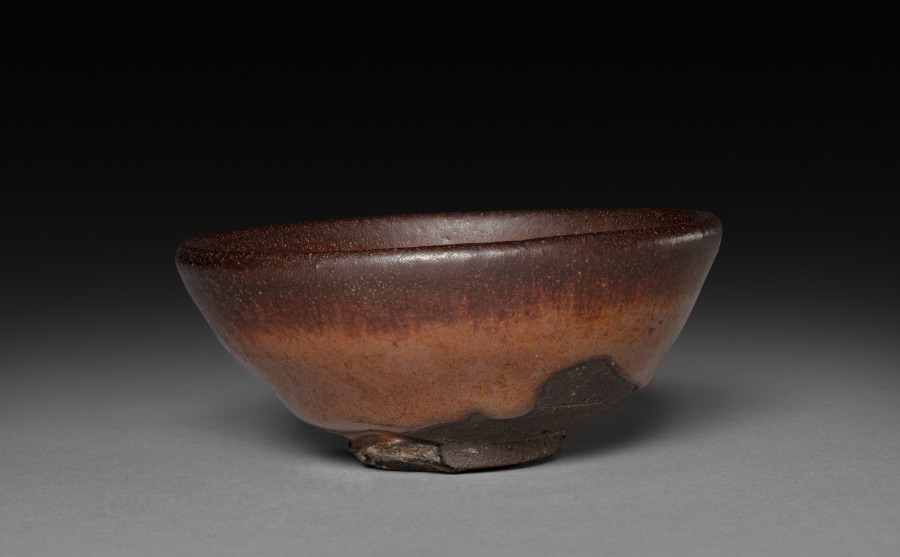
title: Tea Bowl: Jian ware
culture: China, Fujian province, Song dynasty (960-1279)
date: 960– 1279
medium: stoneware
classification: Ceramic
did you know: Jian ware was very popular with the tea cultures in China and Japan.